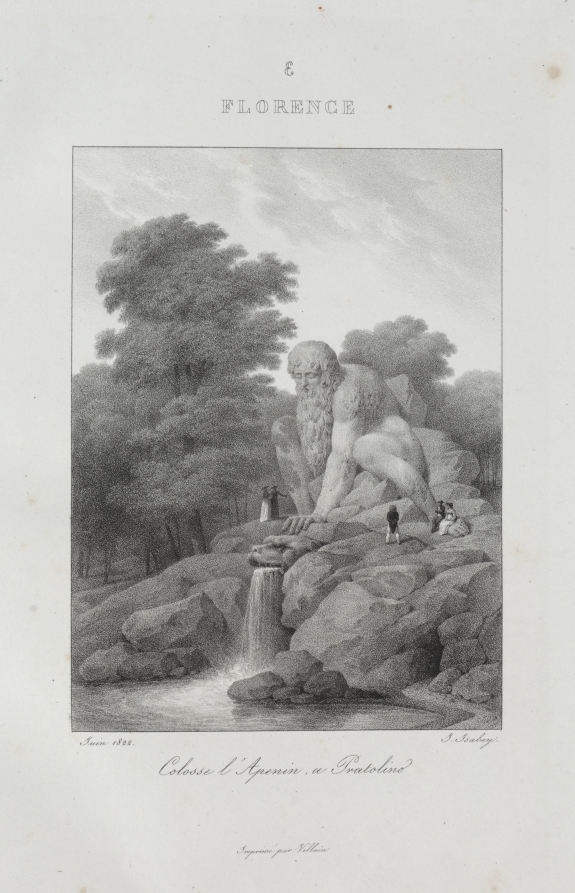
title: Voyage en Italie en 1822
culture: France, 19th century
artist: Jean-Baptiste Isabey (French, 1767–1855)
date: 1833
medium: lithograph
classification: Bound Volume